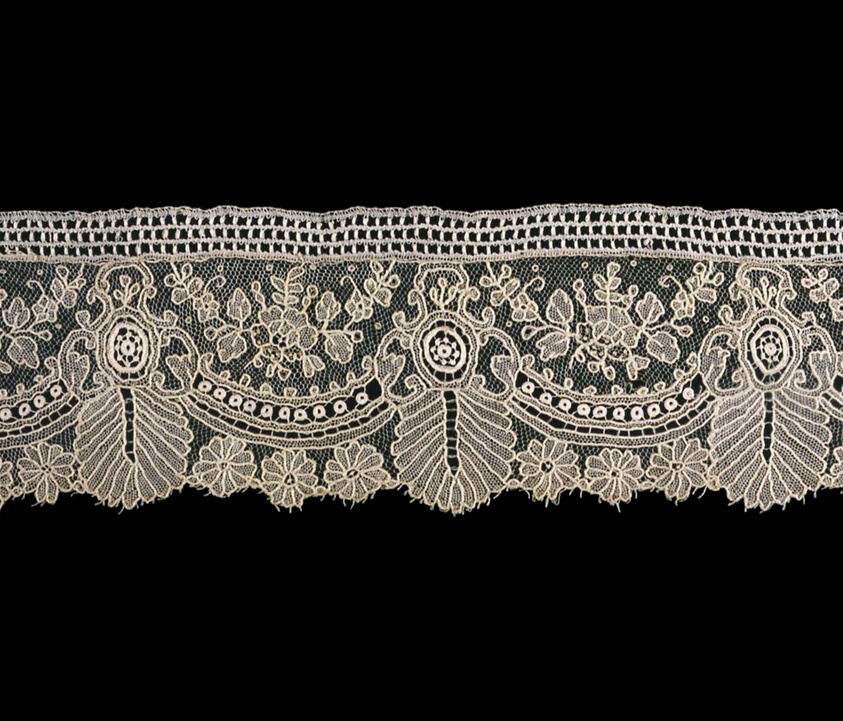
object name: Textile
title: Borders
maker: Belgium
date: 1875/1900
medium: Cotton, needle lace of a type known as "Point de Gaze"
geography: Belgium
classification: textile; lace - needle; lace